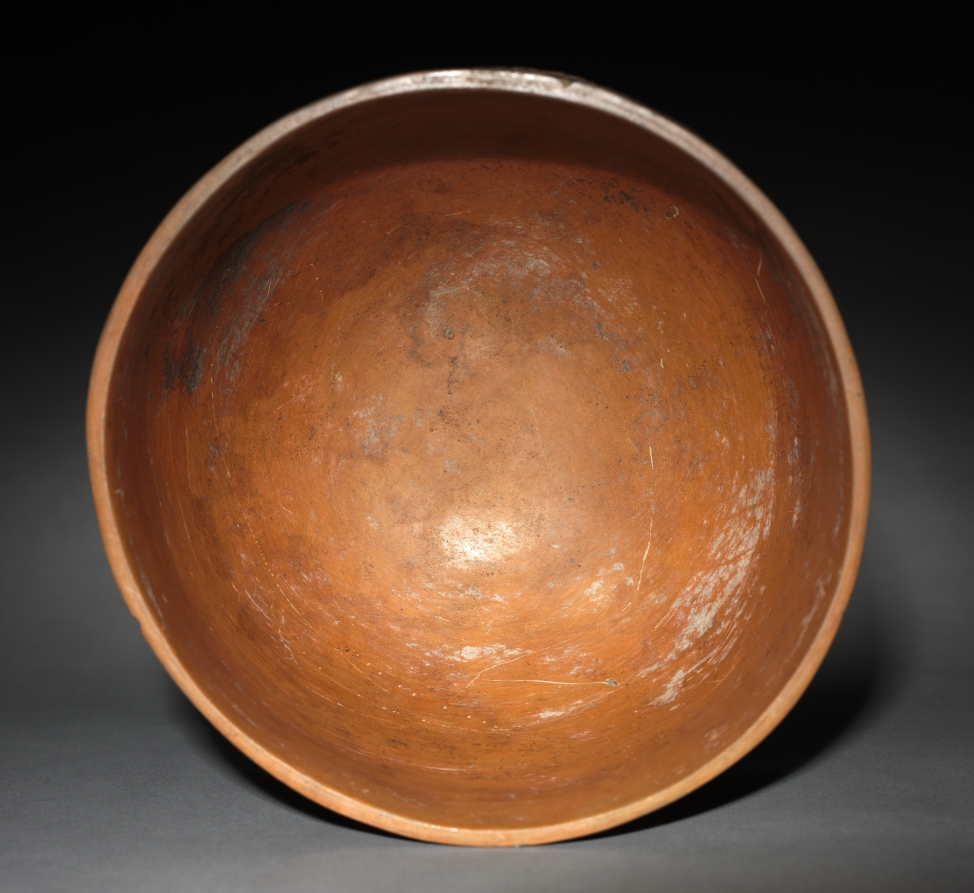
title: Bowl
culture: Mexico, South-central Veracruz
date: c. 500–1000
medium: molded, carved, and burnished pottery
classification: Sculpture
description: This mold-made ceramic bowl is decorated with a band of figures depicted in low relief. Most wear masks or grotesque headdresses, and four seem to struggle with deer. The meaning of the scene, which may be drawn from myth, is unknown.